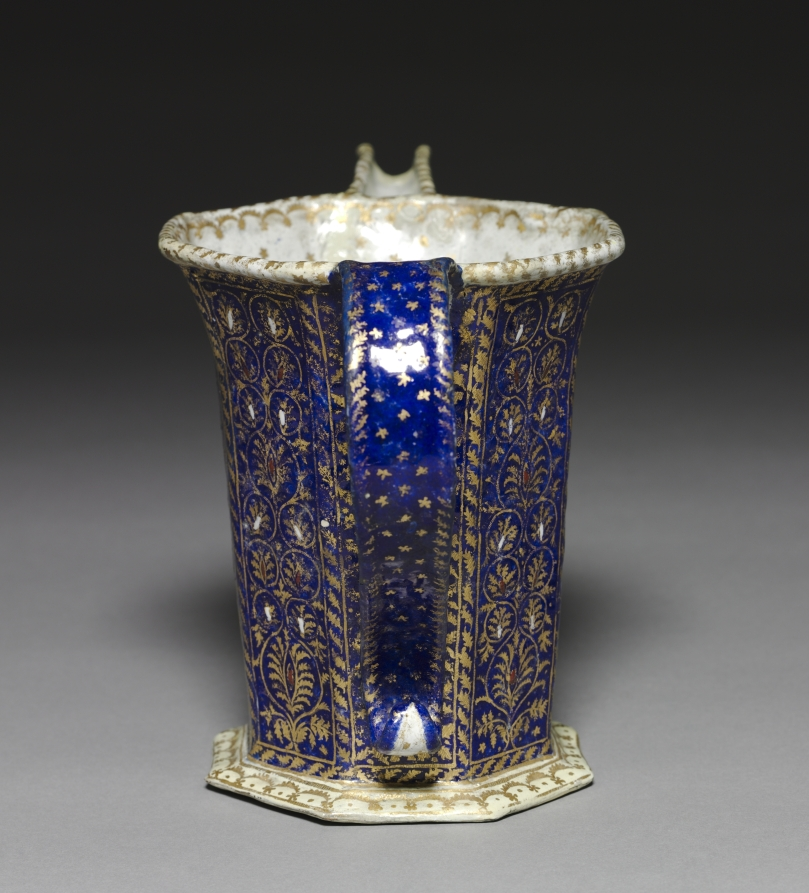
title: Ewer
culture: Italy, Venice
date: c. 1500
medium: painted enamel on copper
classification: Enamel